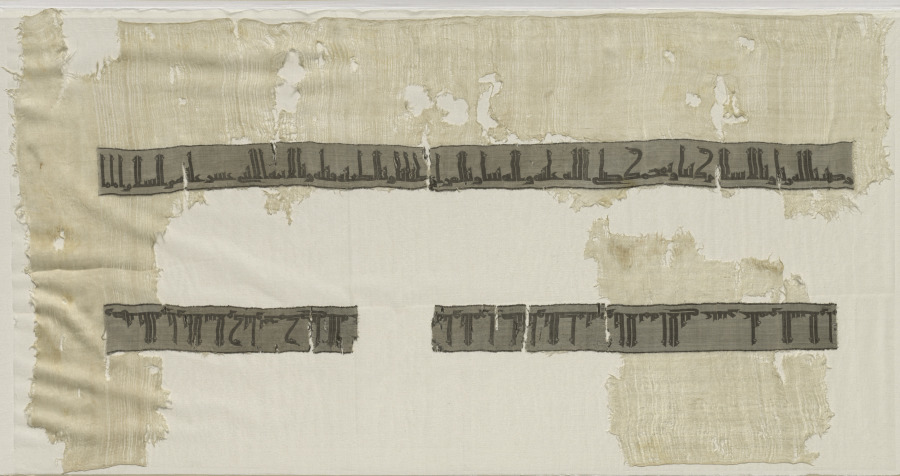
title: Fragments of Inscription Bands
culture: Iraq or Iran, in the style of the Buyid period (945–1055)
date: before 1982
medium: Silk: compound tabby on tabby ground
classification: Textile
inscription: two parallel inscription bands (1966.135 and 1982.299) with Kufic lettering in dark brown on a lighter brown ground run the warp direction of the cream colored textile with the lettering oriented at right angles to the warp: ". . . sallá Allah 'a[layhi wa-alihi] nabi(an in superscript) wa-bi-al-Qur'an kitab(an in superscript) wa-bi-al-Ka'bah [qiblat(an in superscript)] wa-bi-al-a' immah al-ithná 'ashar 'alayhim al-salam i[mam(an in superscript)]